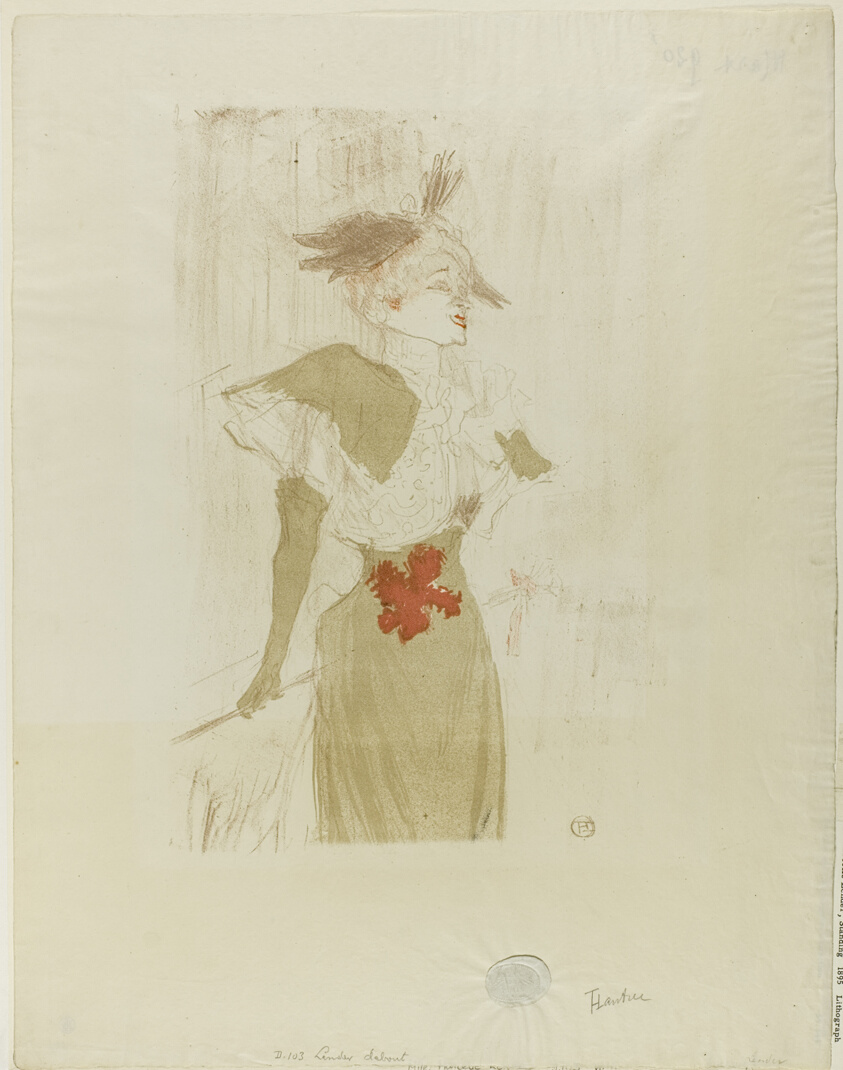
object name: Print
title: Mademoiselle Marcelle Lender, Standing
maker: Henri de Toulouse-Lautrec (French, 1864-1901)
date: 1895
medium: Color lithograph on cream wove paper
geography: France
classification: lithograph; print; prints and drawing